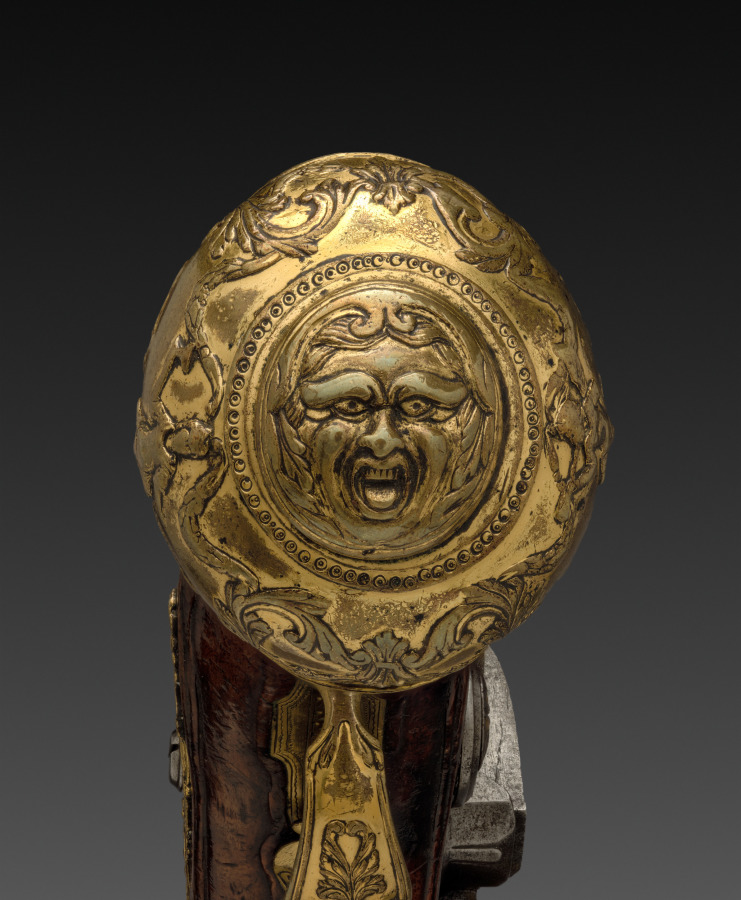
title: Flintlock Pistol (2 of 2)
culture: Franco-Flemish, Liège, early 18th Century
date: early 1700s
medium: steel with gold inlay, gilt-brass mounts; walnut burl stock; chiseled high-relief decoration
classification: Arms and Armor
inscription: on barrel: G. MASSIN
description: The barrel of this pistol is signed G. MASSIN, a gunsmith apparently working in eastern France or French-speaking Flanders, possibly the city of Liège. The exquisite ornament along the breech of the barrel is chiseled and engraved. The gilded lock-plate and mounts may be compared to the finest contemporary work in other media, such as furniture with ormolu mounts.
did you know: The flintlock ignition system was developed in the 1600s and remained the dominant system until the early 1800s.